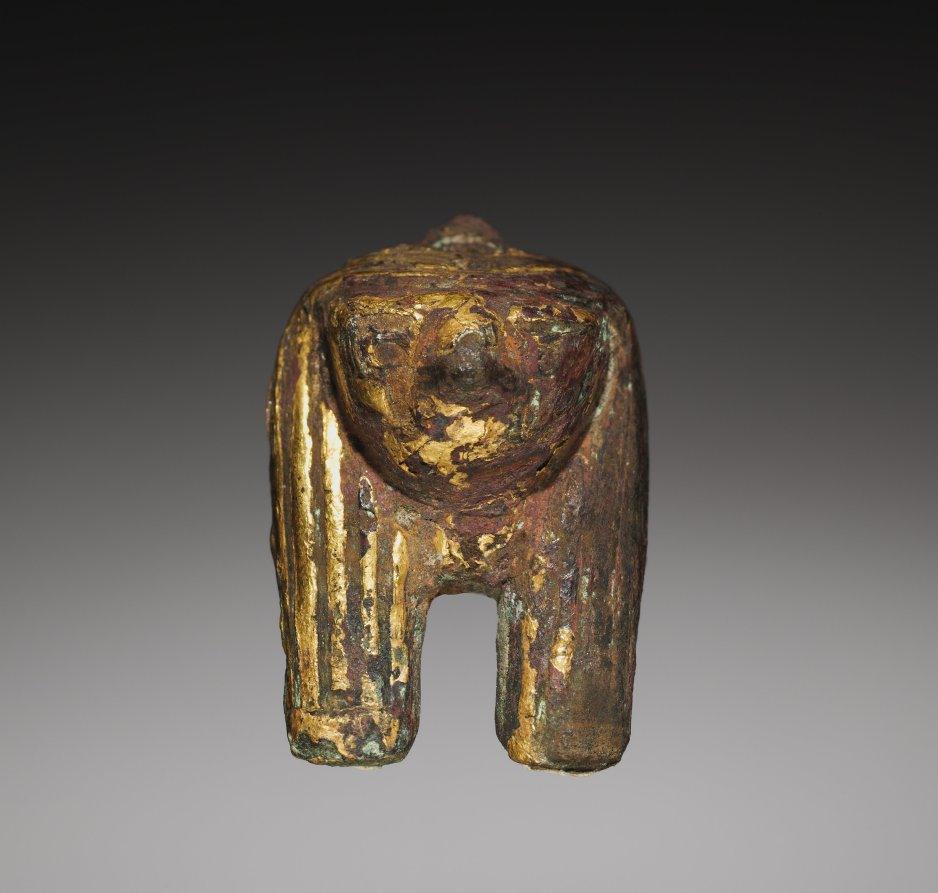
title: Falcon's Head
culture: Egypt, New Kingdom (1540–1069 BCE), Dynasties 18–19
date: 1350–1250 BCE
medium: face of bronze inlaid with gilt copper, wig of black copper (?) with copper striations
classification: Sculpture